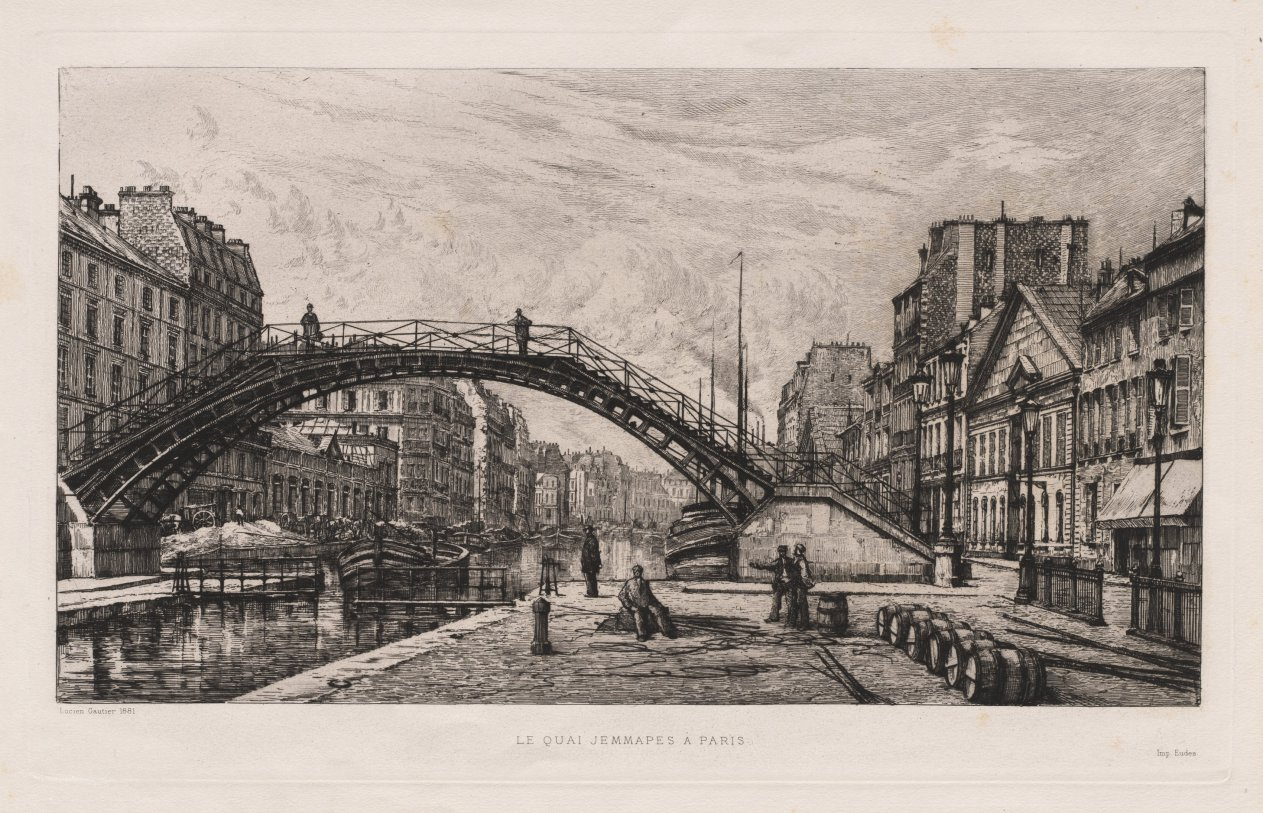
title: Le Quai Jemmapes à Paris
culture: France, 19th century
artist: Lucien Gautier (French, 1850–1925)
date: 1881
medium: etching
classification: Print